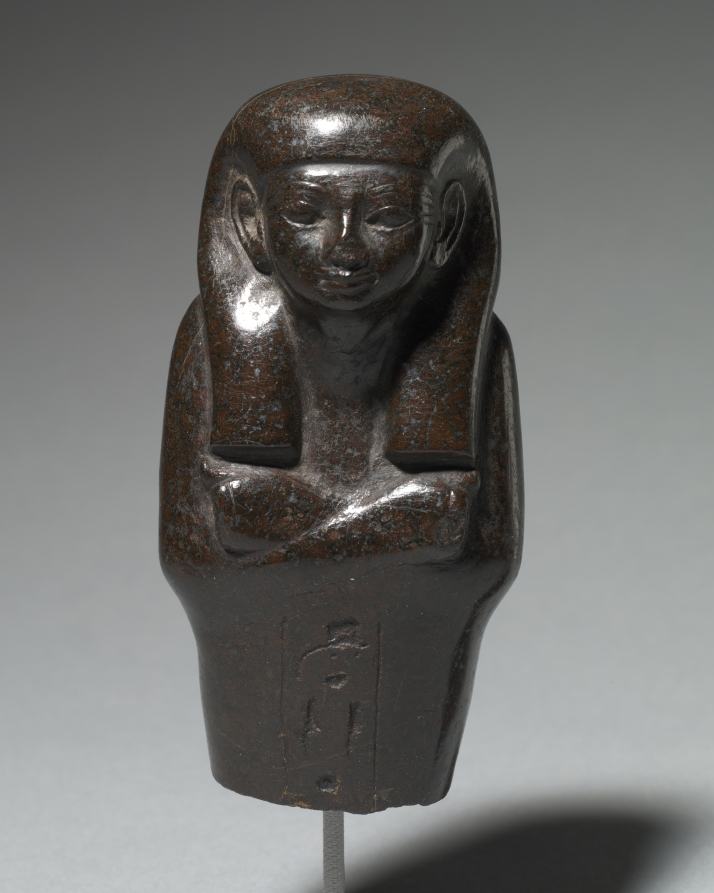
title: Shawabty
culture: Egypt, Middle Kingdom (2040–1648 BCE), Dynasties 12–13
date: c. 1859–1648 BCE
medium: hematite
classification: Funerary Equipment